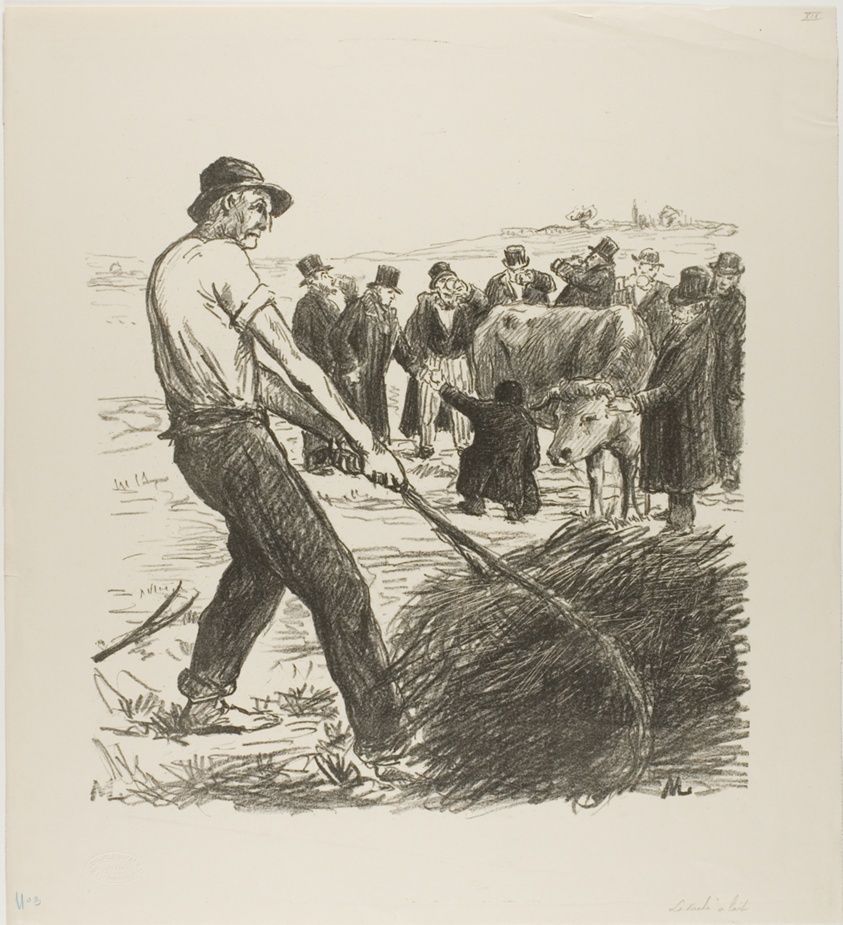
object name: Print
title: Milch Cow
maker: Théophile-Alexandre Steinlen; French, born Switzerland, 1859-1923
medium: Lithograph in black on ivory wove paper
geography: France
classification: lithograph; print; prints and drawing